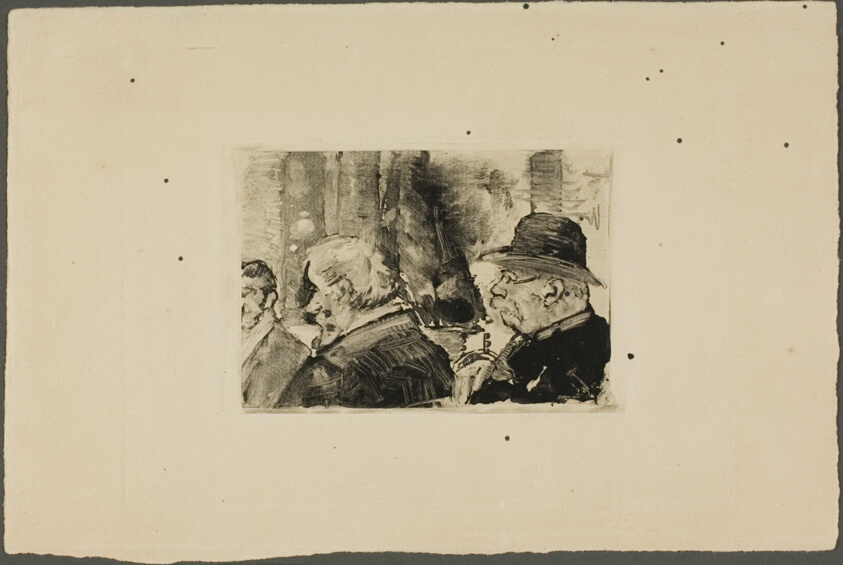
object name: Print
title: Three Men, Half-Length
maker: Henri Edmond Cross (French, 1856-1910)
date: 1895/1900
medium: Monotype in black ink on cream laid paper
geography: France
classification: monotype; print; prints and drawing